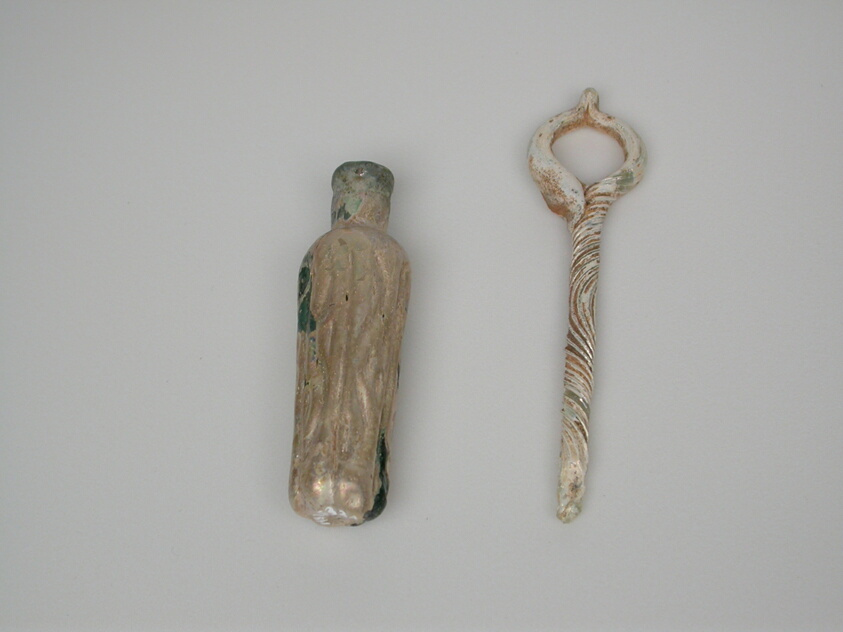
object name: Vessel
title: Perfume Bottle with Looped Stopper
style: roman (ancient, style or period), ancient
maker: Roman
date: 1st century BCE-4th century CE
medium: Glass, mold-blown technique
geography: Italy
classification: glass; vessel; ancient art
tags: beauty, bottles